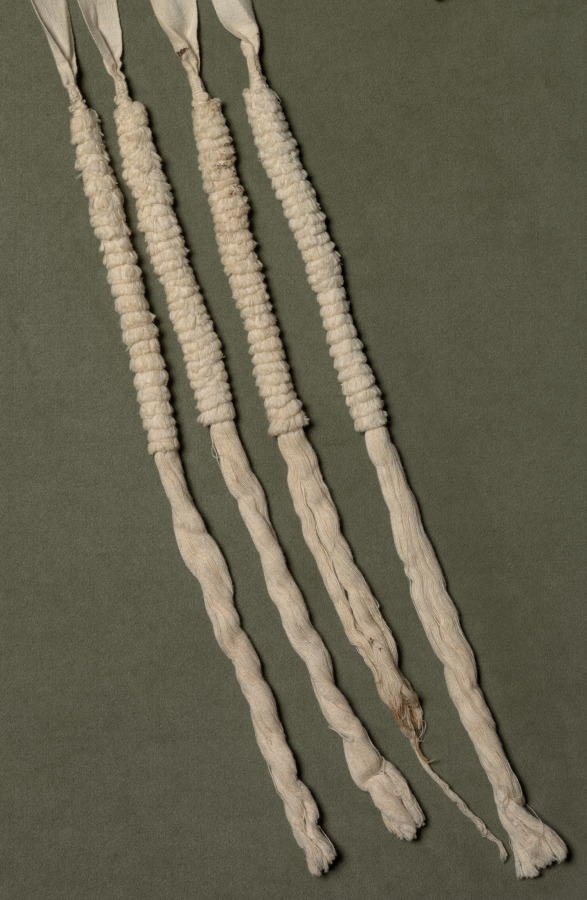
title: Band with Tassels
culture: Peru, North Coast, Chimú style, 1200-1460s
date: 1455–1625 (radiocarbon date, 95% probability)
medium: cotton; weft-faced plain weave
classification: Garment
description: This garment may have been found with others in the collection that formed a matched set worn by a noble of the Chimú, who rose to power on Peru’s north coast after the year 1000.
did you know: The Chimú forged an empire that thrived until the 1460s, when the Inka incorporated it into their own imperial domain.